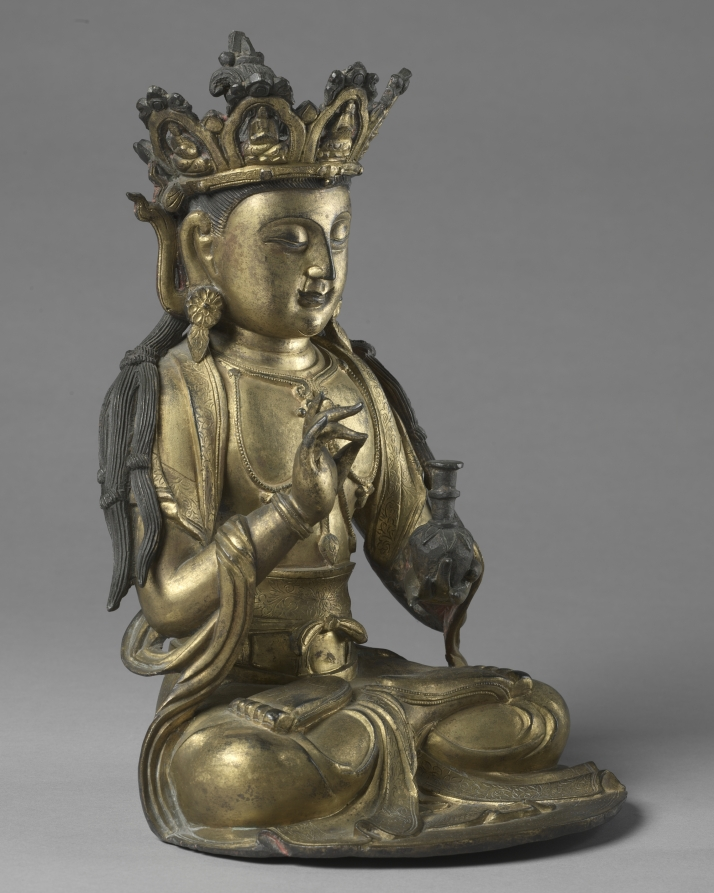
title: Seated Guanyin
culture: China, Ming dynasty (1368–1644)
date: 1368–1644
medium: gilt bronze with polychromy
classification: Sculpture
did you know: This bronze sculpture was created using the lost wax method of casting.